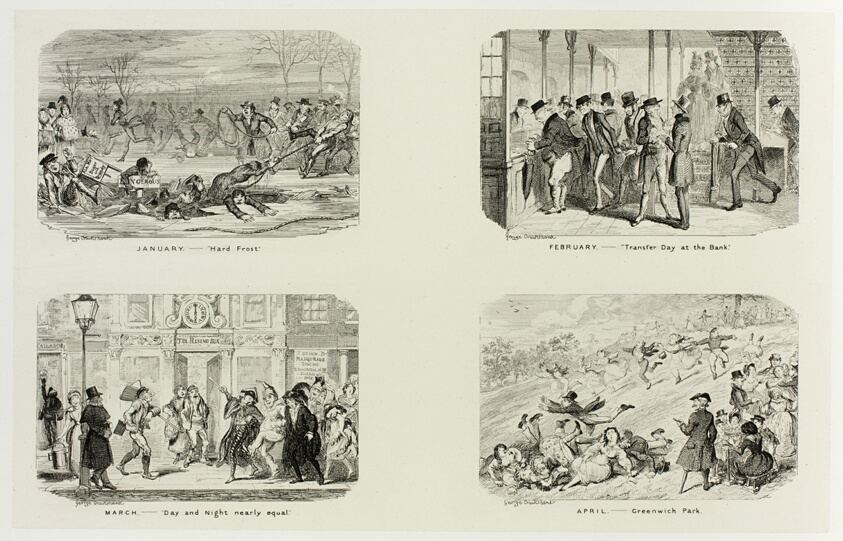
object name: Print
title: January – "Hard Frost" from George Cruikshank's Steel Etchings to The Comic Almanacks: 1835-1853 (top left)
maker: George Cruikshank (English, 1792-1878); published by Pickering & Chatto (English, 19th century)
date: 1836, printed c. 1880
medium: Four steel etchings in black on cream India paper, laid down on off-white card (chine collé)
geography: England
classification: etching; paper; print; prints and drawing